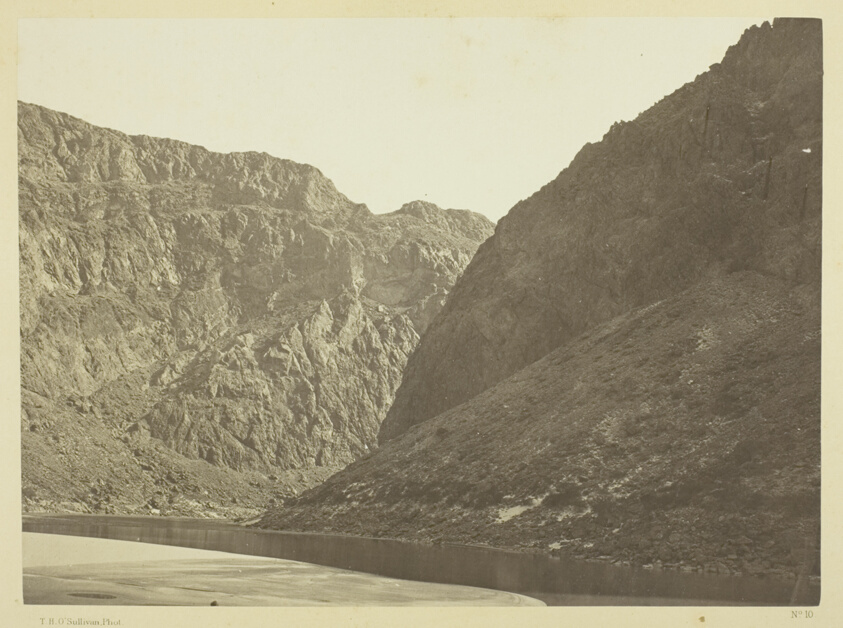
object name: Photograph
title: Entrance to Black Cañon, Colorado River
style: 19th century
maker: Timothy O'Sullivan (American, born Ireland, 1840–1882)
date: 1871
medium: Albumen print, from the album "Geographical & Geological Explorations & Surveys West of the 100th Meridian," vol. 2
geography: United States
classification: albumen print from collodion negative; photograph; photography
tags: Collected by Hugh Edwards